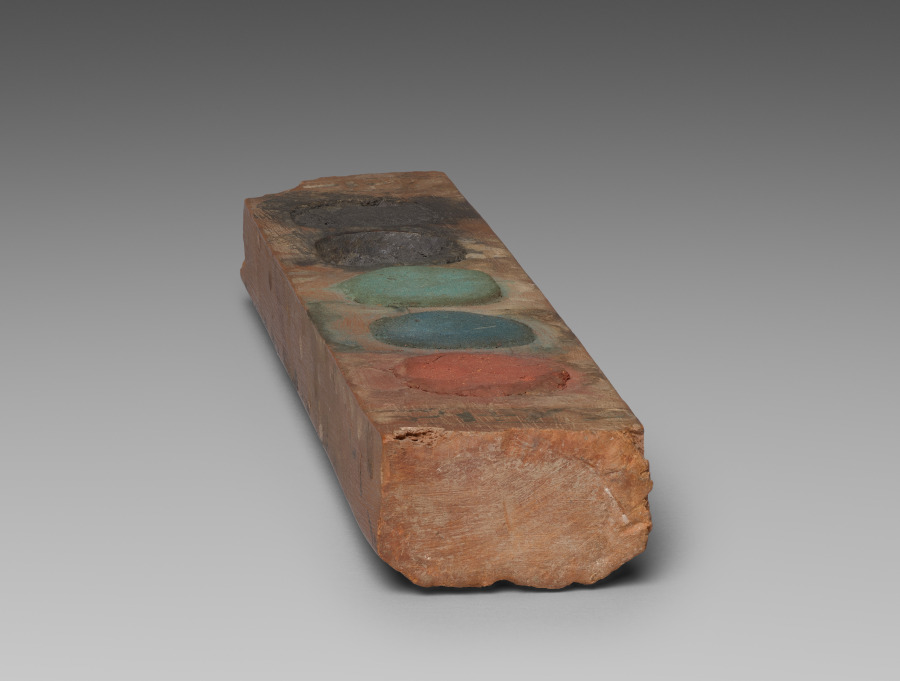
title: Paint Box of Vizier Amenemope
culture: Egypt, New Kingdom (1540–1069 BCE), Dynasty 18, reign of Amenhotep II (1425–1400 BCE)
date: c. 1427–1401 BCE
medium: boxwood with inscription inlaid in Egyptian blue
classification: Implements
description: This paint box still preserves its original cakes of pigment: one cake each of red (red ochre), blue (Egyptian blue), green (a mixture of Egyptian blue, yellow ochre, and orpiment) and two of black (carbon black, from charcoal). It belonged to Amenemope, who was vizier, or prime minister, under Amenhotep II. Amenemope probably used his paint box for recreation.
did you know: Painting was a popular and time-honored pastime among the upper classes in Egypt.